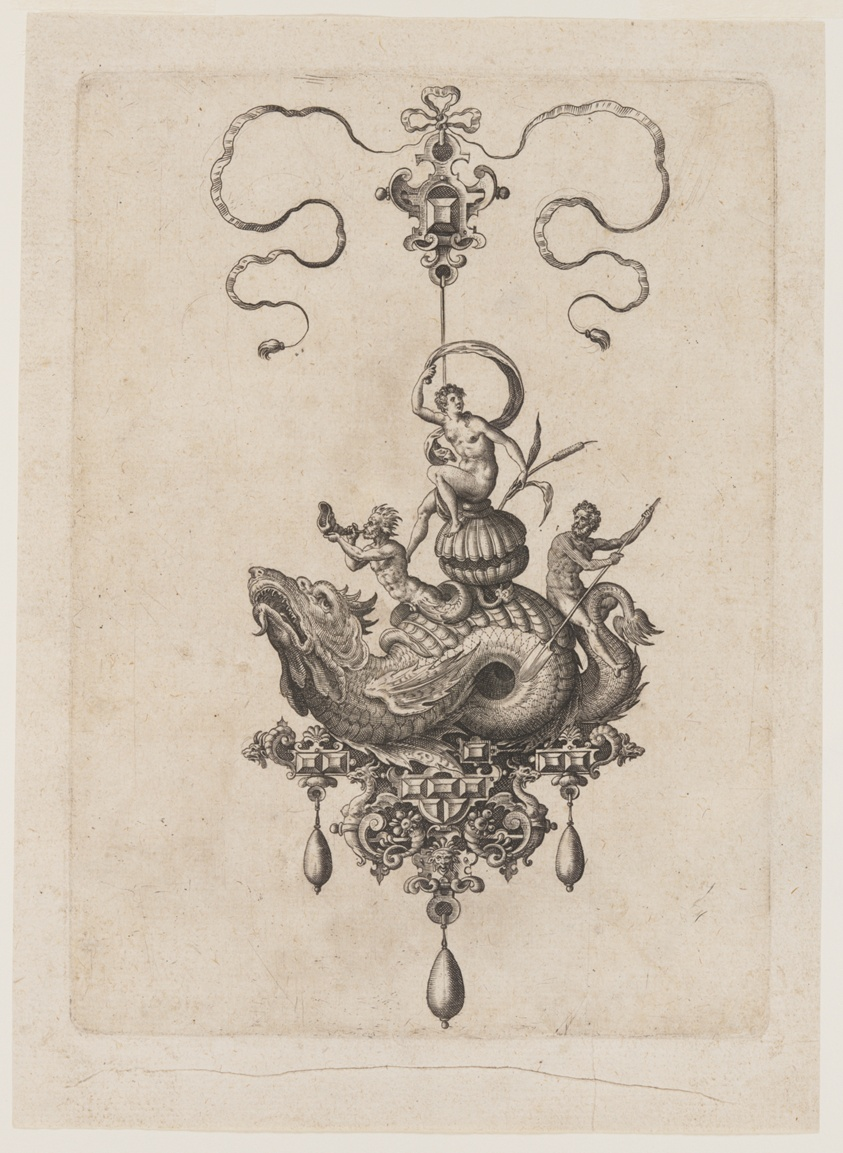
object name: Print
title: Renaissance Jeweled Pendant Sea Monsters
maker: Adriaen Collaert (Flemish, c. 1560–1618); after Hans Collaert (Flemish, c. 1530–1581)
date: 1582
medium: Engraving on ivory laid paper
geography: Flanders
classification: engraving; paper; print; prints and drawing